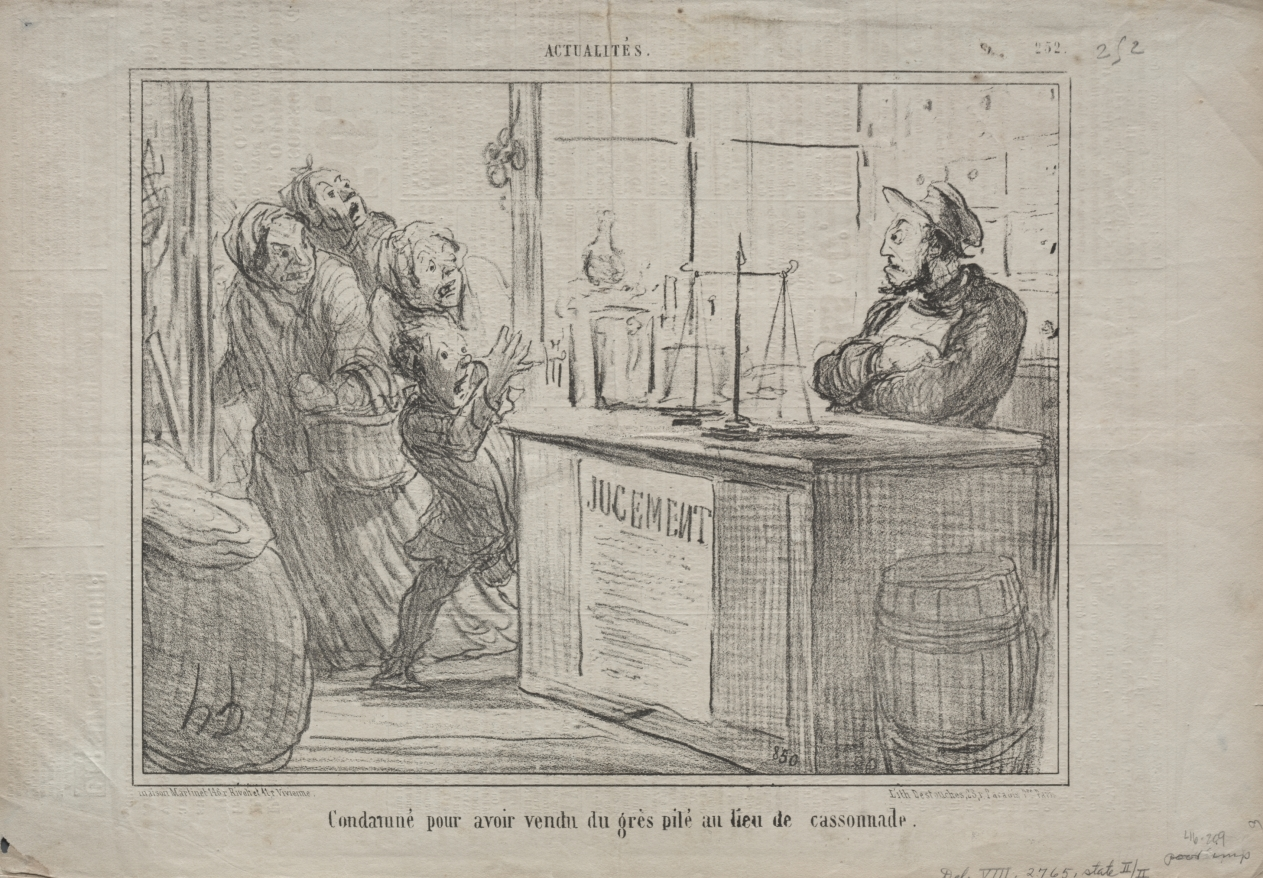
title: Convicted for having sold crushed sandstone instead of brown sugar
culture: France, 19th century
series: News of the Day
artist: Honoré Daumier (French, 1808–1879)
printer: Destouches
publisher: Mon. Martinet, r. Rivoli, et 41 r. Vivienne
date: 1855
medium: lithograph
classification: Print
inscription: Upper margin, pencil 252 ; Lower margin, pencil: Del. viii. 2765, state II/II / 46.289 / poor imp ; lower margin, printed: maison Martinet 146 r. Rivoli et 41, r. Vivienne / Lith. Destouches, 28, r. Paradis Pre. Paris.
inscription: Above image, printed: ACTUALITÉS. / 252 ; Below image, printed: Condamné pour avoir vendu du grès pilé au lieu de cassonnade.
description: This print was published in Le Charivari (December 7, 1855) as plate 252 from the series News of the Day.